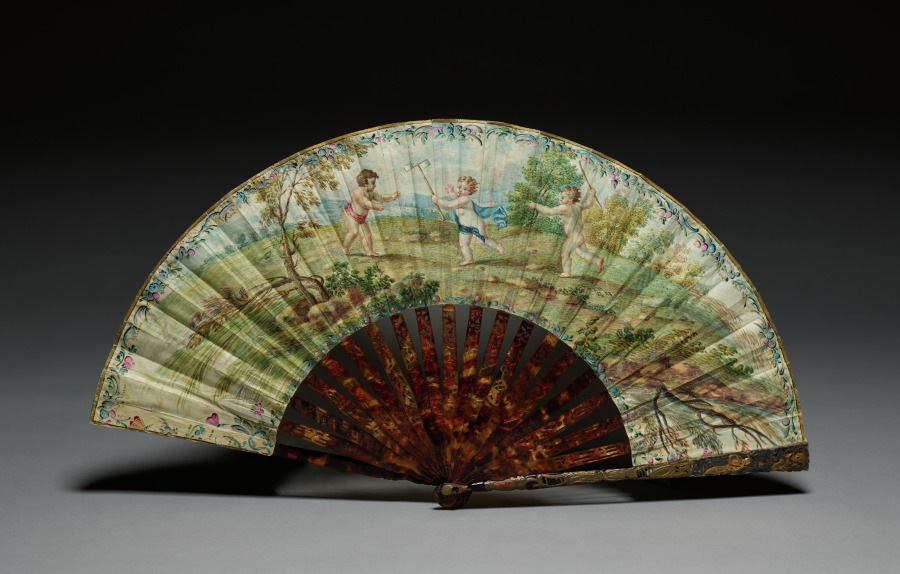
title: Folding Fan: Mythological Scene with Diana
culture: Italy, Rome(?), 18th century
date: c. 1730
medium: tortoise-shell sticks, painted skin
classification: Miscellaneous